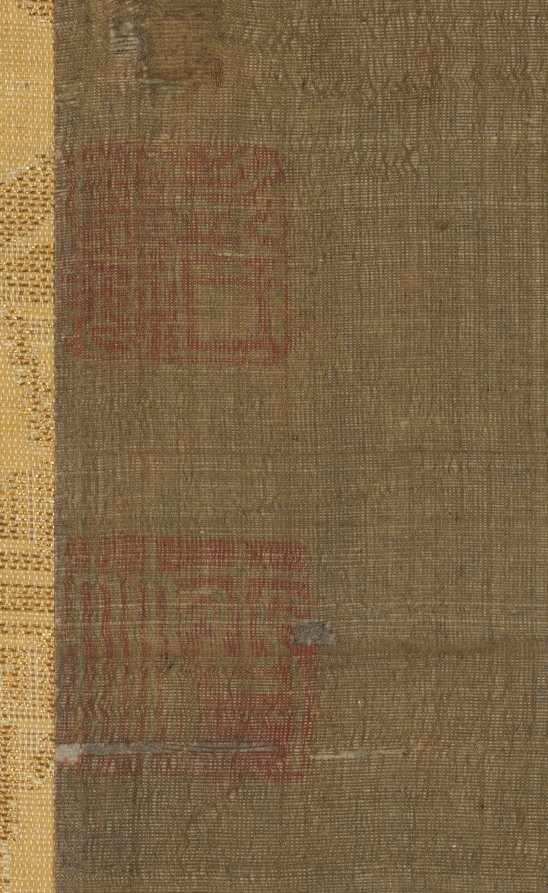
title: Ink Plum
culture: China, Ming dynasty (1368–1644)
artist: Peng Xu (Chinese, active 1488–1521)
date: late 1400s–early 1500s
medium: hanging scroll, ink on silk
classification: Painting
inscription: Artist's 2 seals at left middle edge of painting: Peng shi Te-mien; Shih-chu.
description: Seasonal paintings, including those depicting flowering plum trees in early spring, furnished scholars’ studios or other interior spaces in the house. Peng Xu is considered the foremost follower of the famous plum blossom painter Wang Mian (1287–1359) (see CMA 1974.26). The branches are brushed in the same vigorous manner leaving white streaks in the ink indicating the gnarled bark. The delicate blossoms are drawn in fine lines, while a gray wash covers the entire surface, only leaving the flower petals in reserve.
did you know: Plum trees blossom in the first months of the year; the delicate flowers endure the harsh winter frosts. A popular motif in Chinese ink painting, the plum symbolizes the winter season and is a harbinger of spring.